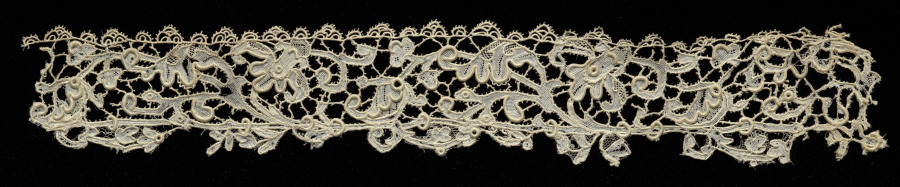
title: Lace Strip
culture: Italy, Venice, 1600s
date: 1600s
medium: Needle lace (Venetian Raised Point)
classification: Lace